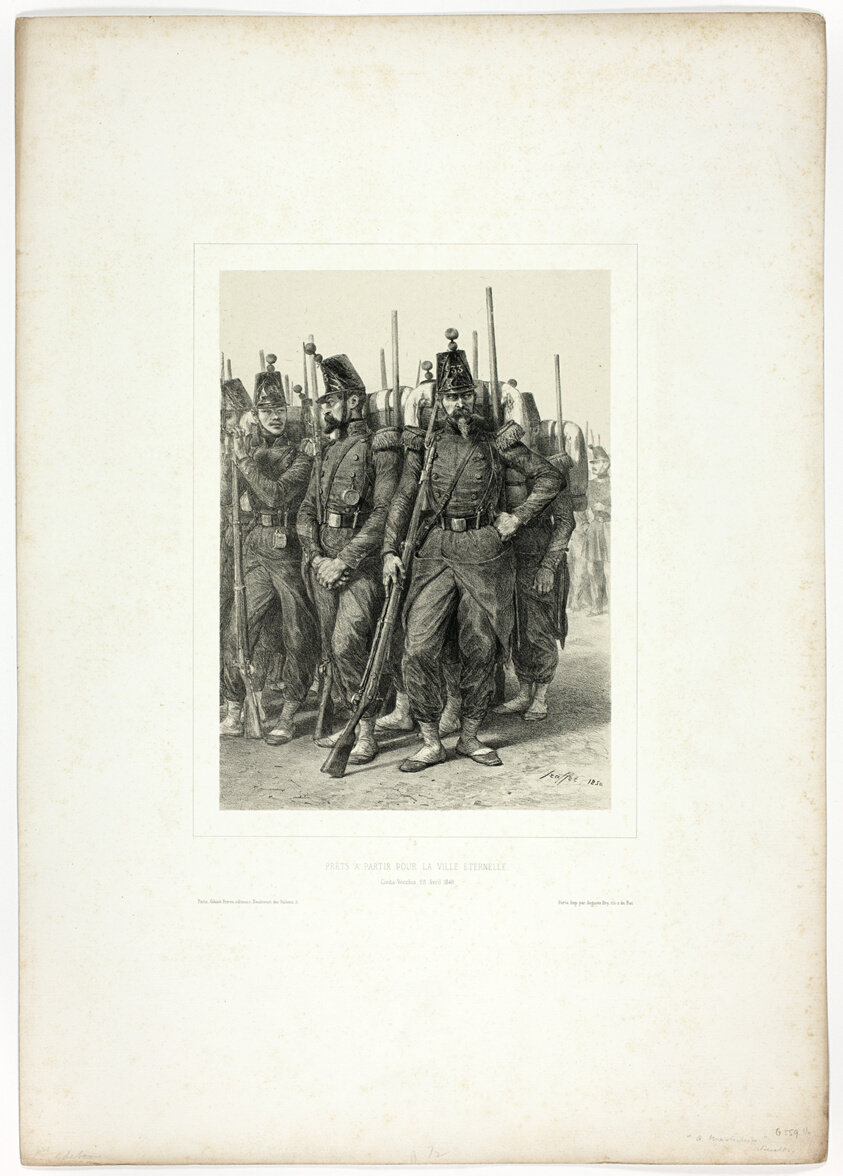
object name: Print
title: Ready to leave for the Eternal City, from Souvenirs d’Italie: Expédition de Rome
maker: Denis Auguste Marie Raffet (French, 1804-1860); printed by Auguste Bry (French, 19th century); published by Chez Gihaut Frères (French, 19th century)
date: 1850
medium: Lithograph in black on buff wove chine laid down on ivory wove paper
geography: France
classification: lithograph; print; prints and drawing